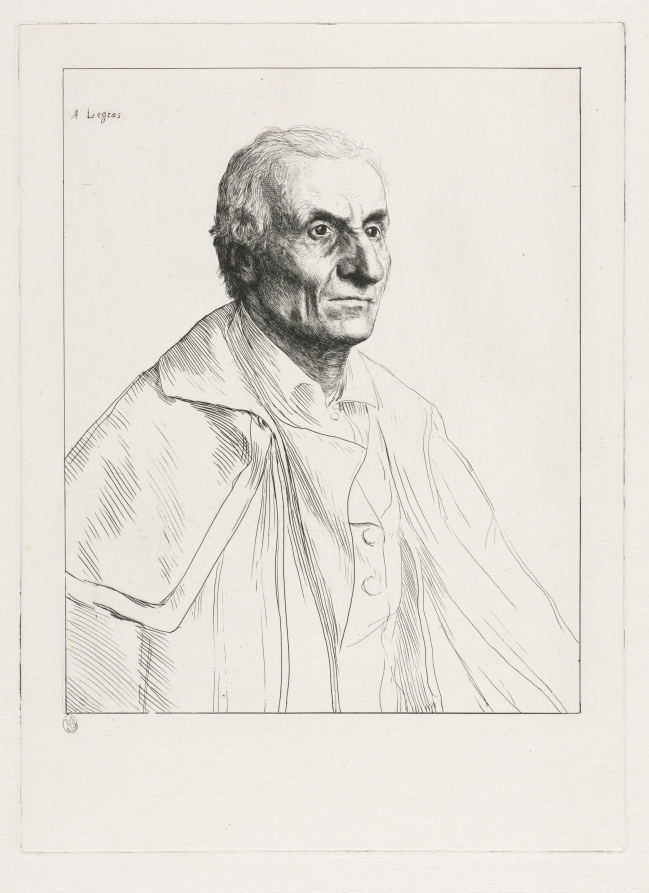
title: The Great Spaniard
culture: France, 19th century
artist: Alphonse Legros (French, 1837–1911)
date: c. 1857–1911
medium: drypoint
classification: Print